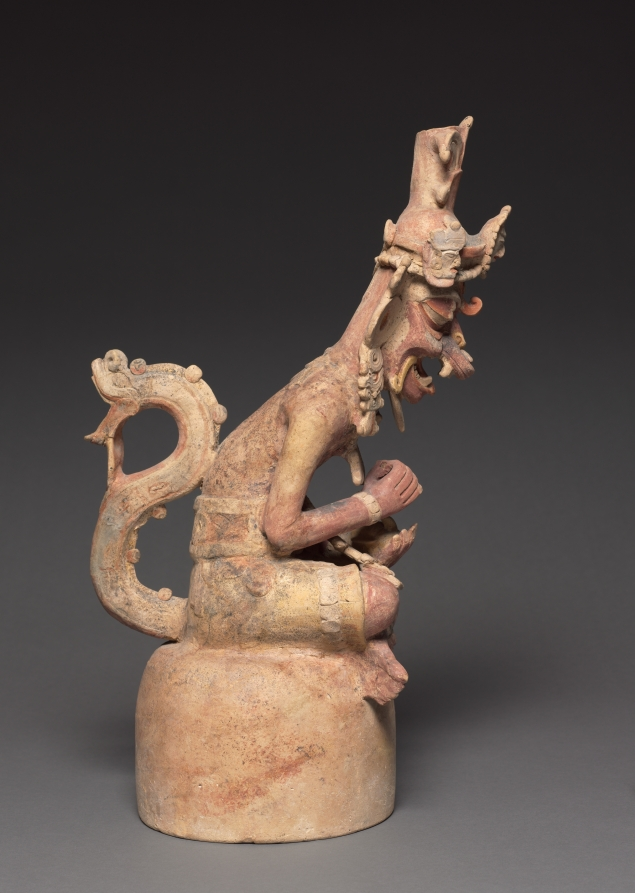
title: Artisan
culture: Guatemala, Petén region, Maya style (250-900), Maya style (250-900)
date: 250–600 CE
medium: earthenware with colored slips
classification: Sculpture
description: These figures represent the supernatural patrons of the visual arts and writing: the brothers Hun Batz and Hun Chuen ("One Monkey" and "One Artisan"). The two were refined artists but also bullies who tormented their younger brothers, who took revenge by transforming their elders into monkeys. Many Maya representations of the painter-scribes immortalize this fate by depicting the pair with both simian and human features, as here. The brothers are shown engaged in artistic or scribal pursuits. Sitting on high-domed bases that may have served as the lids of incense or offering bowls, each apparently once grasped a tool in his upper hand-for instance, a paint brush or a stylus for writing. In the lower hand, one cradles a small mask and the other, a piece of bark that likely refers to the beaten bark from which the Maya made books.